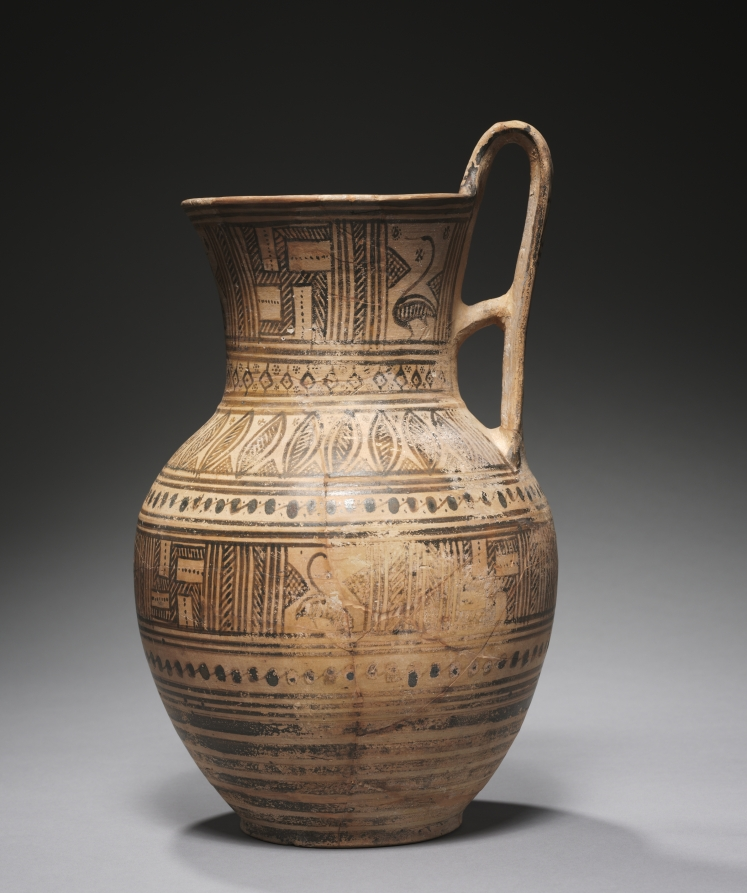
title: Geometric Pitcher: Swans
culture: Greek, Attic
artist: attributed to Swan Painter (Greek, Attic, Late Geometric Ib-IIa)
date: c. 740–730 BCE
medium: ceramic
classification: Ceramic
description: A common shape in the Late Geometric period, the pitcher often attains large dimensions, offering the painter multiple zones for decoration. Here, standing leaves encircle the shoulder, while the neck and body bear wide bands with alternating squares of swans and swastikas. Also known as a hooked cross, the swastika appears frequently as a decorative motif in Greek Geometric pottery, without any clear meaning. The swans, though somewhat abstracted to modern eyes, likely represent one of many waterfowl species native to Greece.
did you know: The stylized swans lend their name to the otherwise anonymous decorator of this vase.